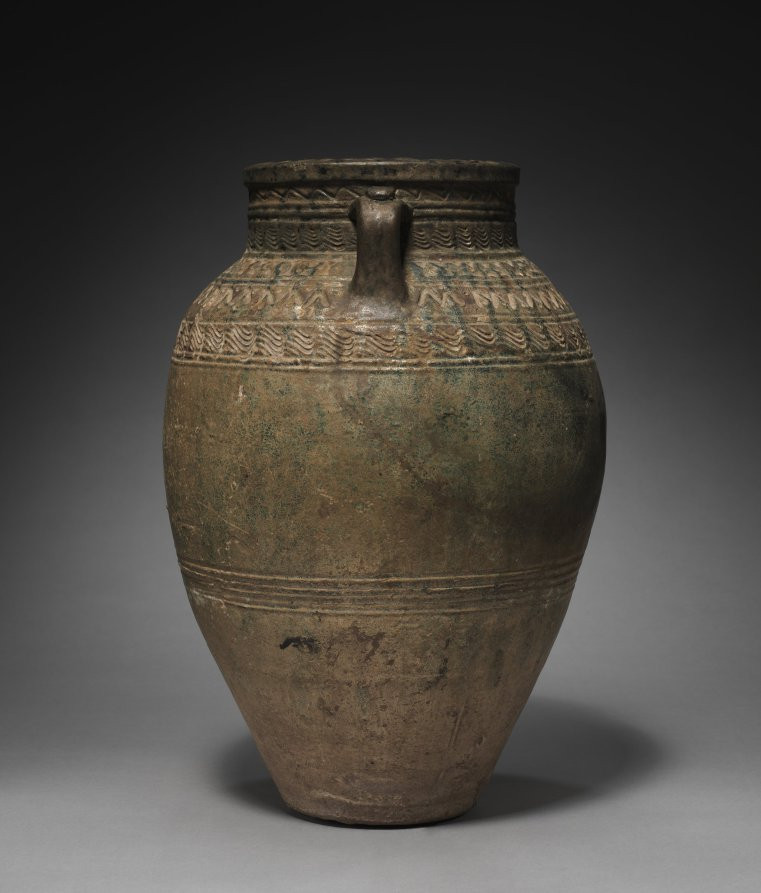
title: Jar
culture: Iran, Sasanian Empire (224–651 CE)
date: 222–650 CE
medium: earthenware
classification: Ceramic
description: Simply decorated with bands of wavy and dotted sawtooth patterns on the neck and shoulder, this large jar features two small handles for lifting and a wide mouth for easy access to its contents. A shiny glaze covers the exterior surface.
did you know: This large vessel was thrown in three or four sections.